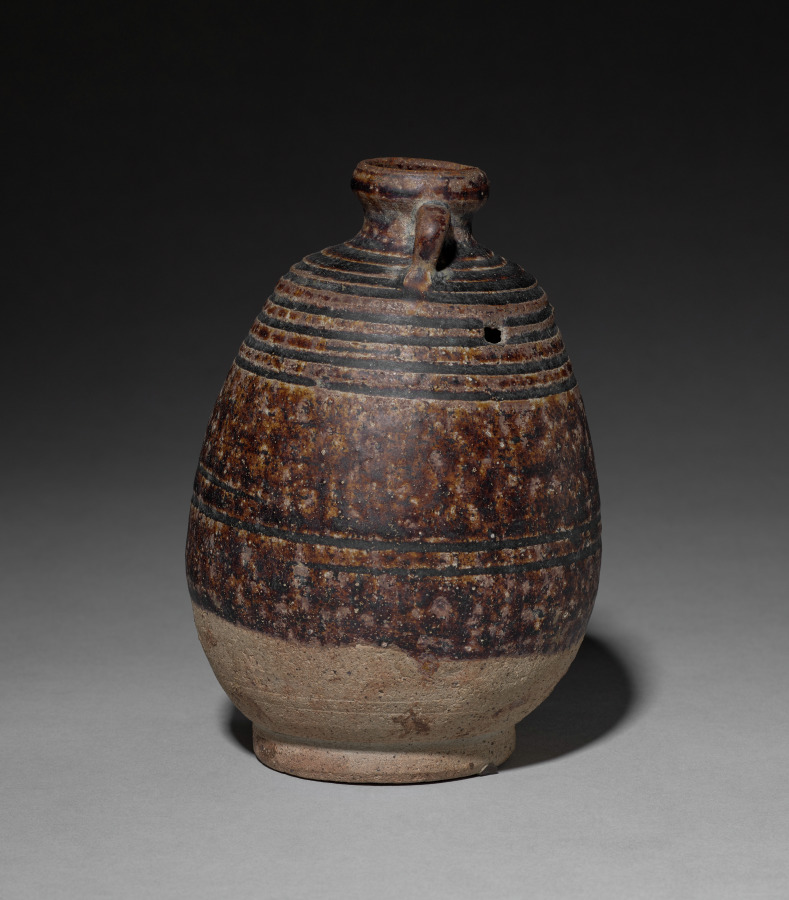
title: Bottle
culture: Siam, Sawankhalok ware, late 13th-14th Century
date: late 1200s-1300s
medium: stoneware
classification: Ceramic